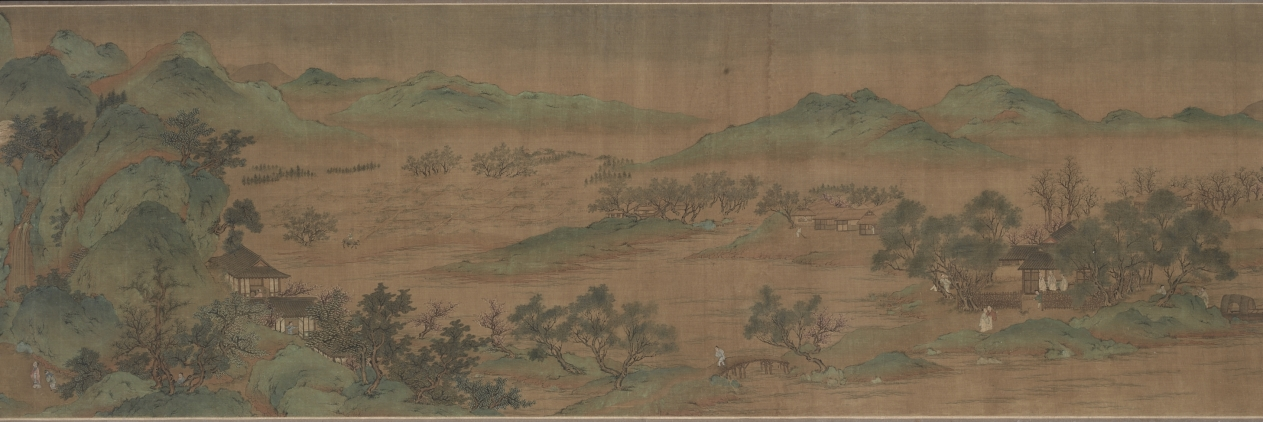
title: Landscape, The Palace of the Clouds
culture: China, Qing dynasty (1644-1911)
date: 1644–1911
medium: handscroll, ink on silk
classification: Painting